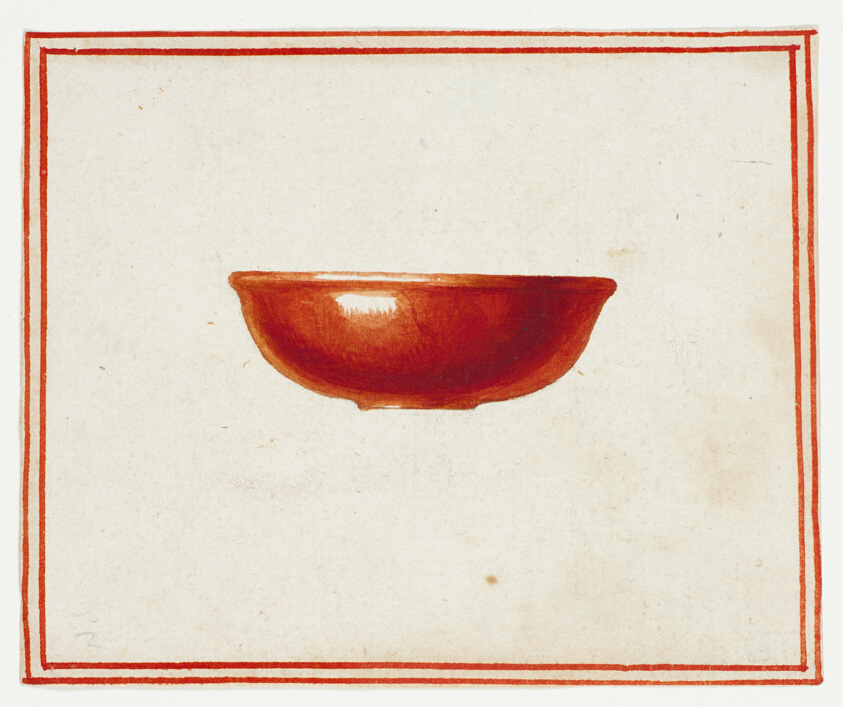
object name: Drawing and Watercolor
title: Red Saucer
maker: Giuseppe Grisoni (Italian, born Flanders, 1699-1769)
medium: Red gouache over traces of black chalk on ivory laid paper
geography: Flanders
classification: gouache; drawings (visual works); prints and drawing